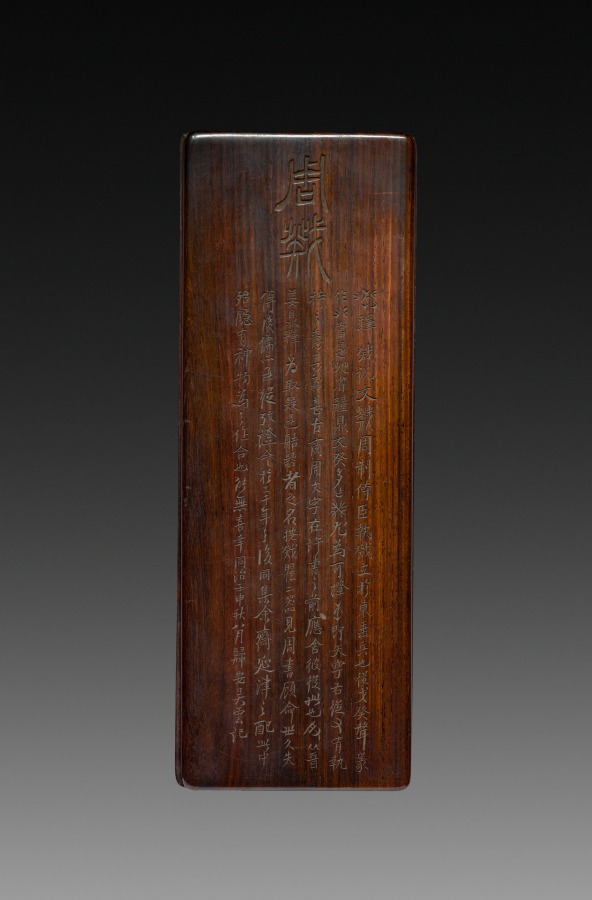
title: Spearhead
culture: China, Zhou dynasty (c. 1046–256 BCE)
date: 1045–256 BCE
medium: bronze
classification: Arms and Armor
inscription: Two ancient characters incised on the blade.